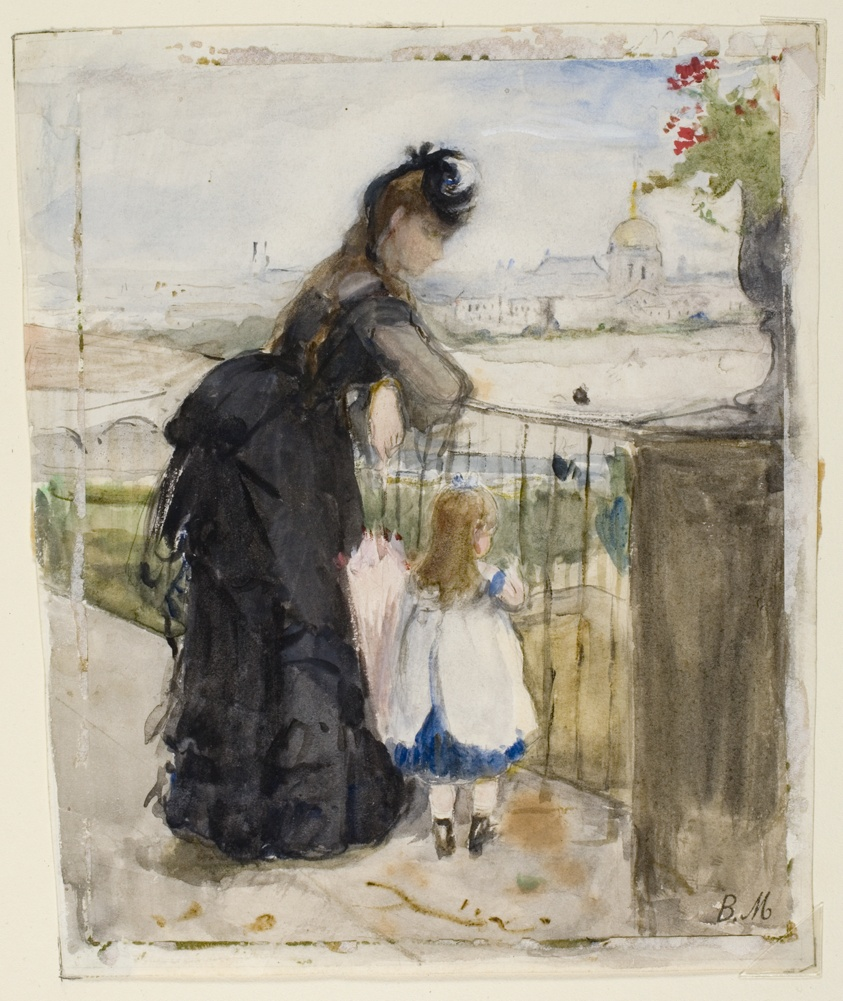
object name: Drawing and Watercolor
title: On the Balcony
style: Impressionism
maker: Berthe Morisot (French, 1841-1895)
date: 1871/72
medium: Watercolor, with touches of gouache, over graphite, on off-white wove paper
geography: France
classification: watercolor; drawings (visual works); prints and drawing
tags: Century of Progress, women, leisure, children, world's fairs, Chicago World's Fairs